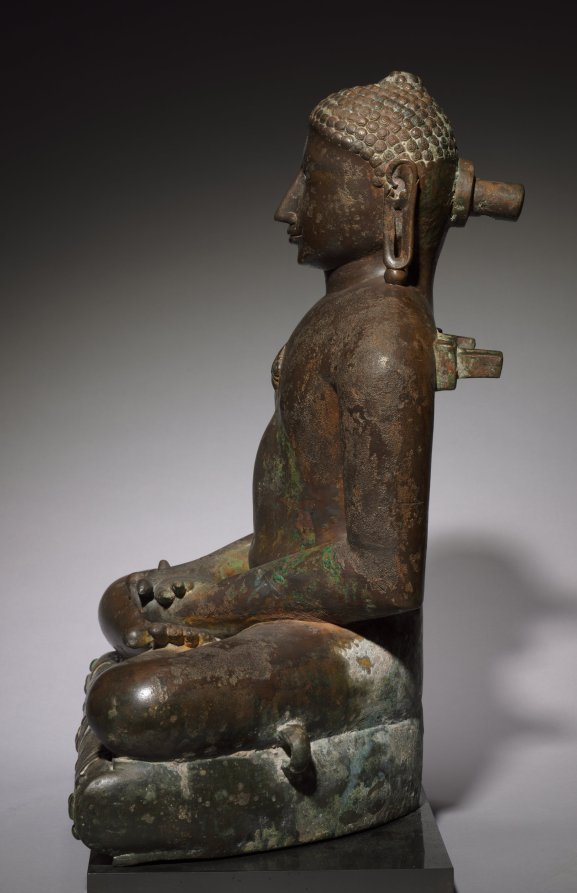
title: Jina (Tirthankara)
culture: India, Rajasthan, Medieval period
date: 900s–1000s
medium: bronze with silver inlay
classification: Sculpture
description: Jainism was one of the three major religions to evolve in India, the other two being Hinduism and Buddhism. While each religion developed its own particular characteristics, their beliefs maintained a common ground with Hinduism. In both Jainism and Buddhism, deities symbolize enlightened beings whose example is meant to inspire believers in following the path toward salvation rather than worshipping them. In Jainism the most common deities are Jinas (meaning "liberators" or "victors"), also known as Tirthankaras ("holy men"). As the name implies, they are beings "liberated" through enlightenment from the cycle of rebirth. There are 24 of these Jain patriarchs. This sculpture represents one of the 24 Jinas, but the absence of attributes makes it impossible to determine which one. This is not surprising since Jinas tend to look alike. Although this figure wears a cloth around his waist, Jinas are usually shown naked—a reference to their renunciation of worldly goods—and seated cross-legged in the posture of meditation (dhyanasana) with their hands resting in their laps (in the dhyana mudra), palms turned upward. Their physical appearance is always the same: broad shoulders, tapering torso, and long, highly stylized limbs. The head, with its round face and short-cropped curls, has a small protrusion at the top. The facial expression conveys self-assurance, wisdom, and compassion. Such a figure would usually have a halo attached to the back of the head. The present bronze dates to a time when some of the finest Jain sculptures and monuments were produced in India, as documented by such temples as Mt. Abu in Rajasthan (the area where this sculpture originated), Khajuraho in Madhya Pradesh, or Srivana Belgola in Karnataka.